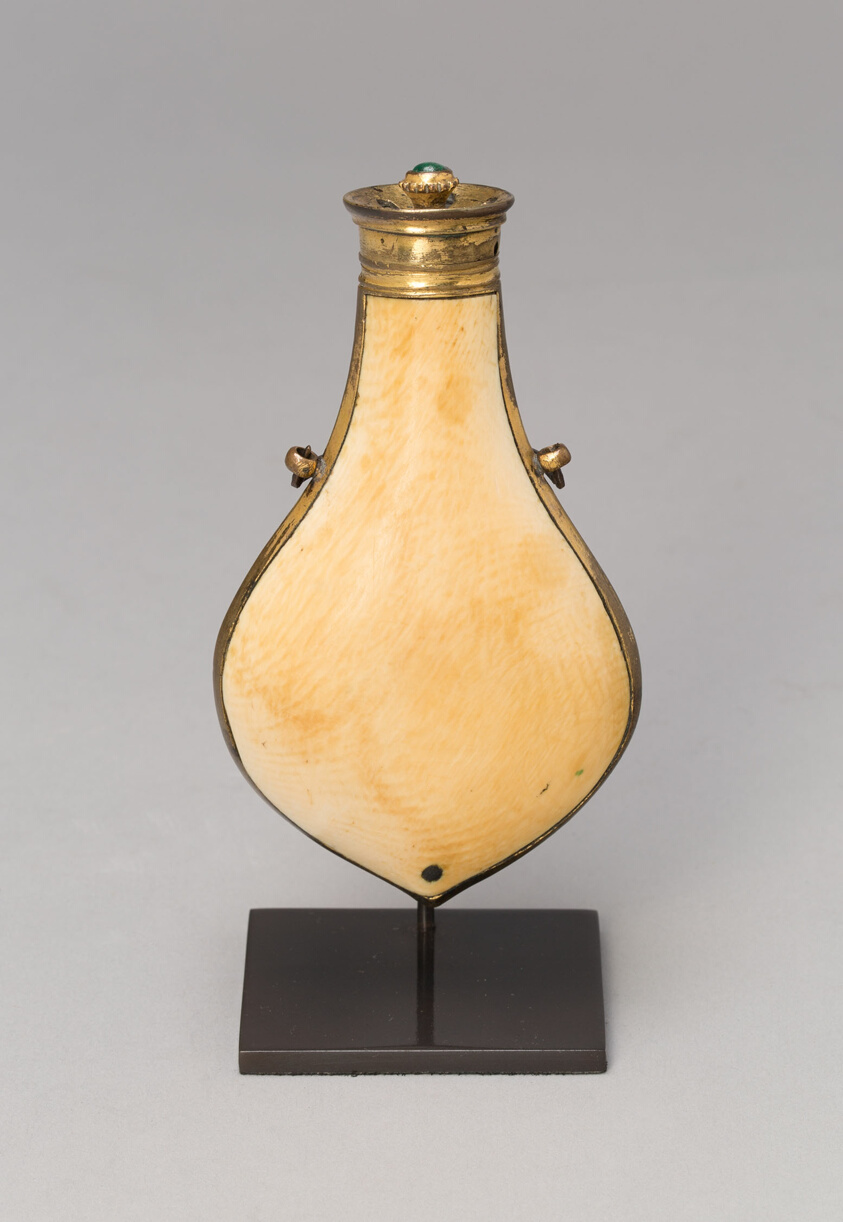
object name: Vessel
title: Gun Powder Flask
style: Islamic (culture or style)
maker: Turkey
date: Ottoman dynasty (1299–1923), c. 1780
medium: Gilded copper and ivory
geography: Ottoman Empire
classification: decorative arts